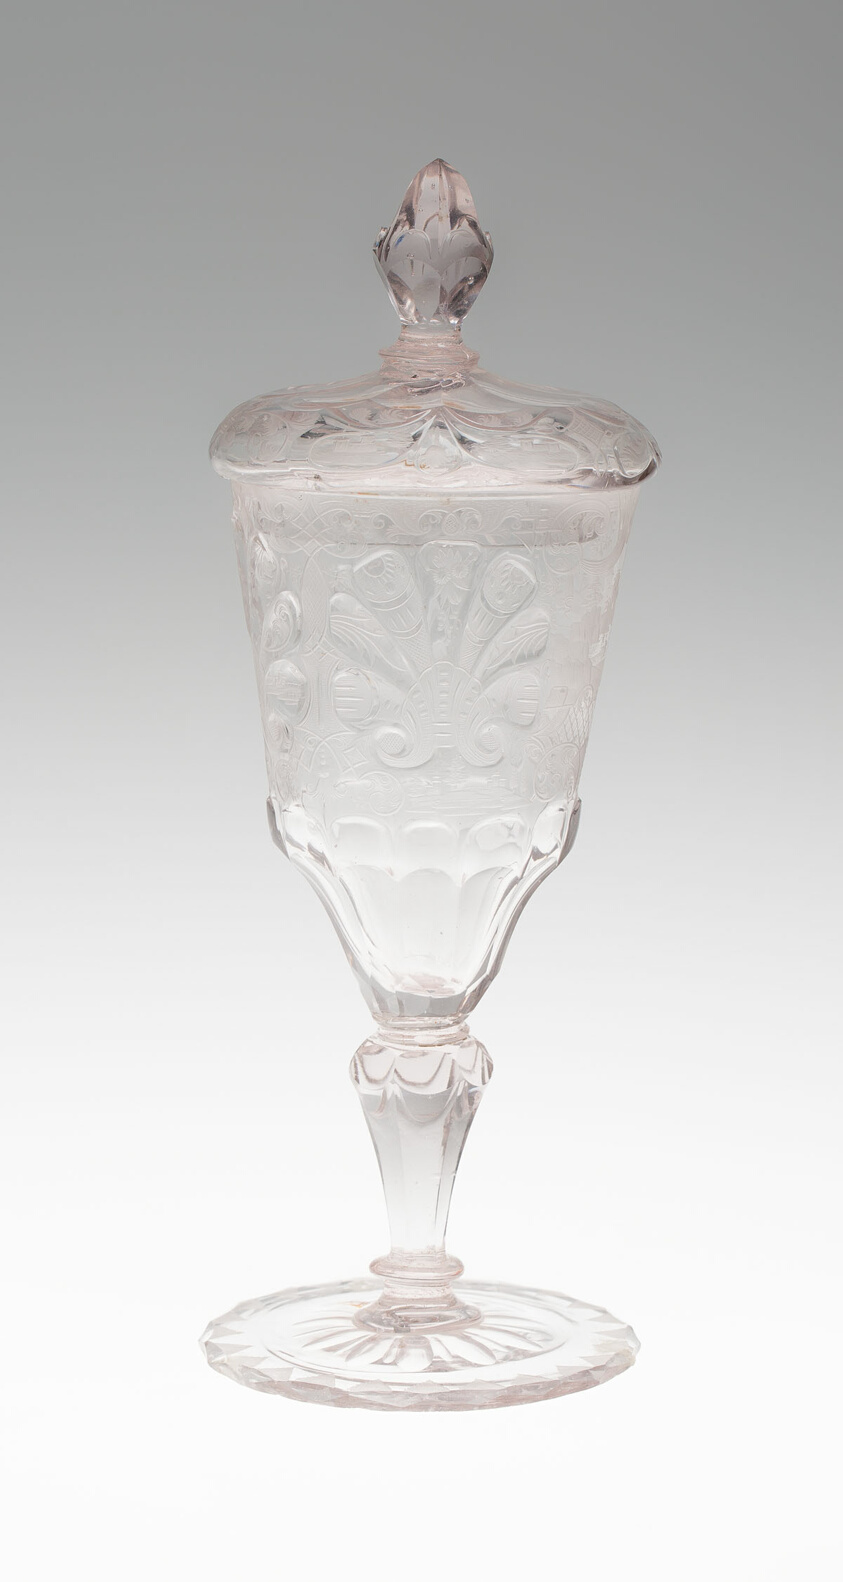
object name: Glass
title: Goblet with Cover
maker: Germany, Schleswig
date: c. 1745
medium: Glass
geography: Schleswig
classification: drinking vessel; glass; european decorative arts